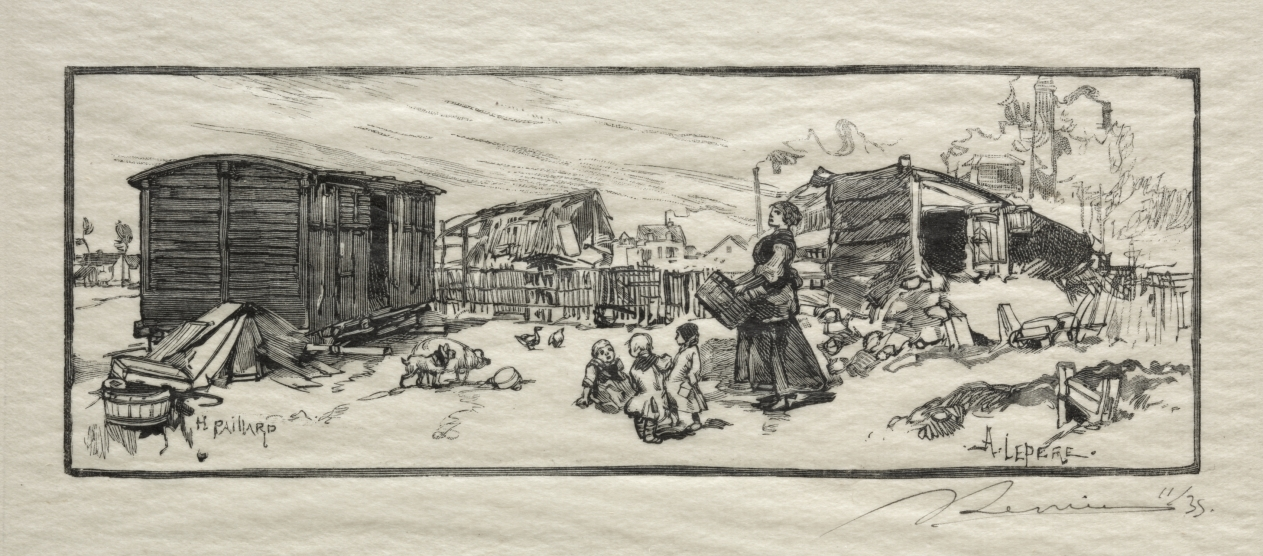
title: The Carriage House (Le wagon-logement)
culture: France, 19th-20th century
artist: Auguste Louis Lepère (French, 1849–1918)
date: 1886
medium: wood engraving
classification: Print